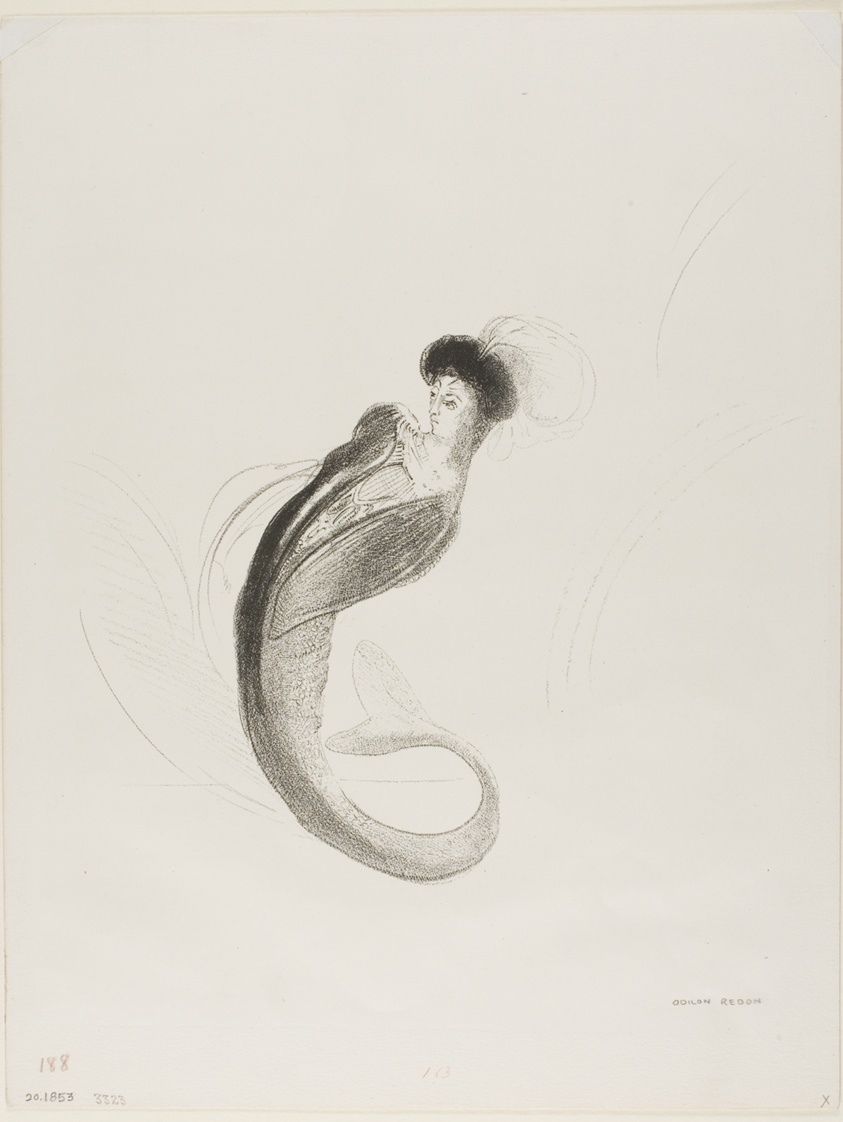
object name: Print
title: Untitled Trial Lithograph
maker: Odilon Redon (French, 1840-1916)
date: 1900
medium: Lithograph in black on heavy ivory wove paper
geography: France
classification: lithograph; print; prints and drawing; paper